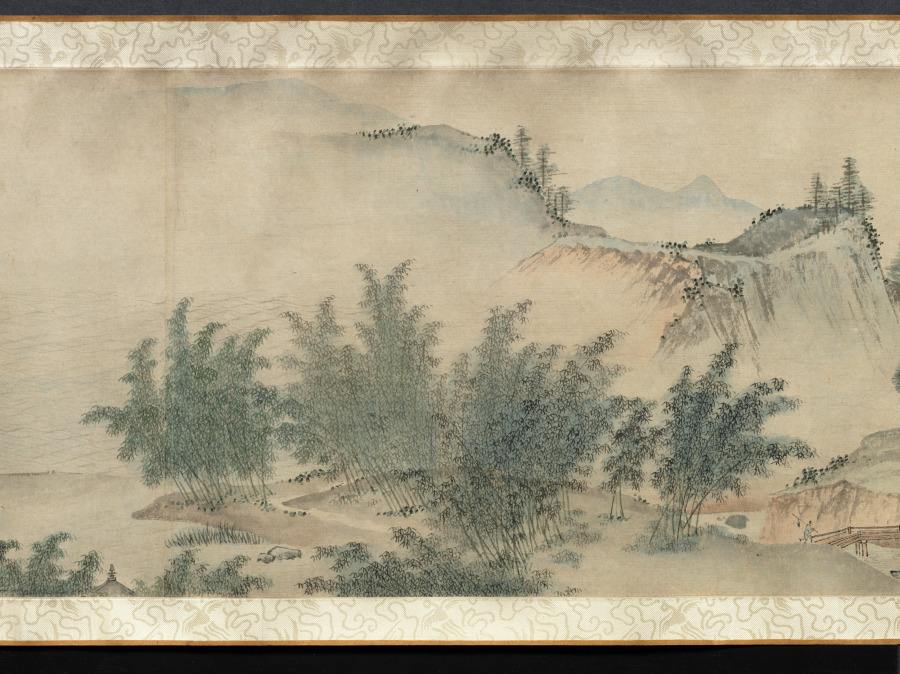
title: Ten Thousand Li of the Yangzi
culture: China, Ming dynasty (1368–1644)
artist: Dai Jin (Chinese, 1388–1462)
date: c. 1400s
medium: Handscroll; ink and color on paper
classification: Painting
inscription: Two colophons at end. Artist's seals: Dai Jin 戴進 and Wenjin 文進.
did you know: Dai Jin is traditionally considered the founder of the Zhe School, a style of landscape painting.